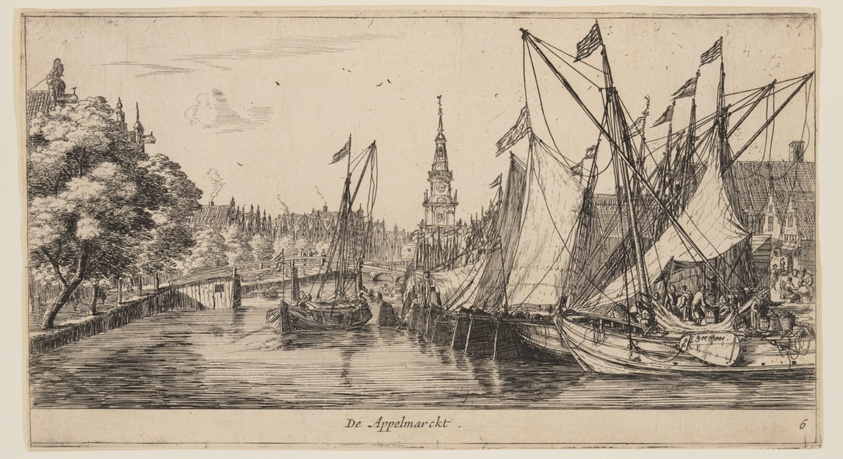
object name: Print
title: De Appelmarckt, from Views of Amsterdam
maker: Reinier Nooms, called Zeeman (Dutch, c. 1623–1664)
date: c. 1660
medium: Etching on ivory laid paper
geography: Netherlands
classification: etching; paper; print; prints and drawing